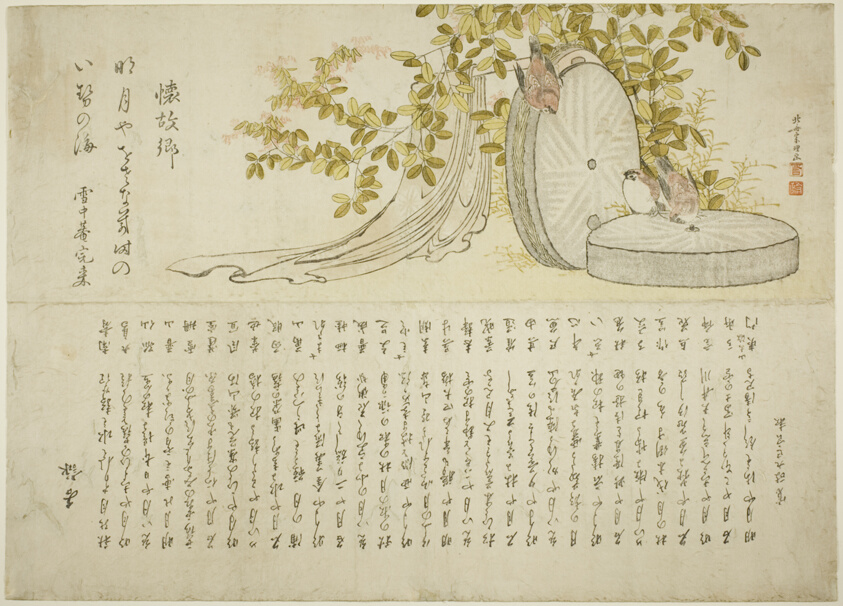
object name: Print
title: Sparrows on Millstones with Hagi Bushes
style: Japanese (culture or style)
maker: Katsushika Hokusai 葛飾 北斎; Japanese, 1760-1849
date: 1797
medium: Color woodblock print; large surimono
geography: Japan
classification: woodblock print; print; asian art